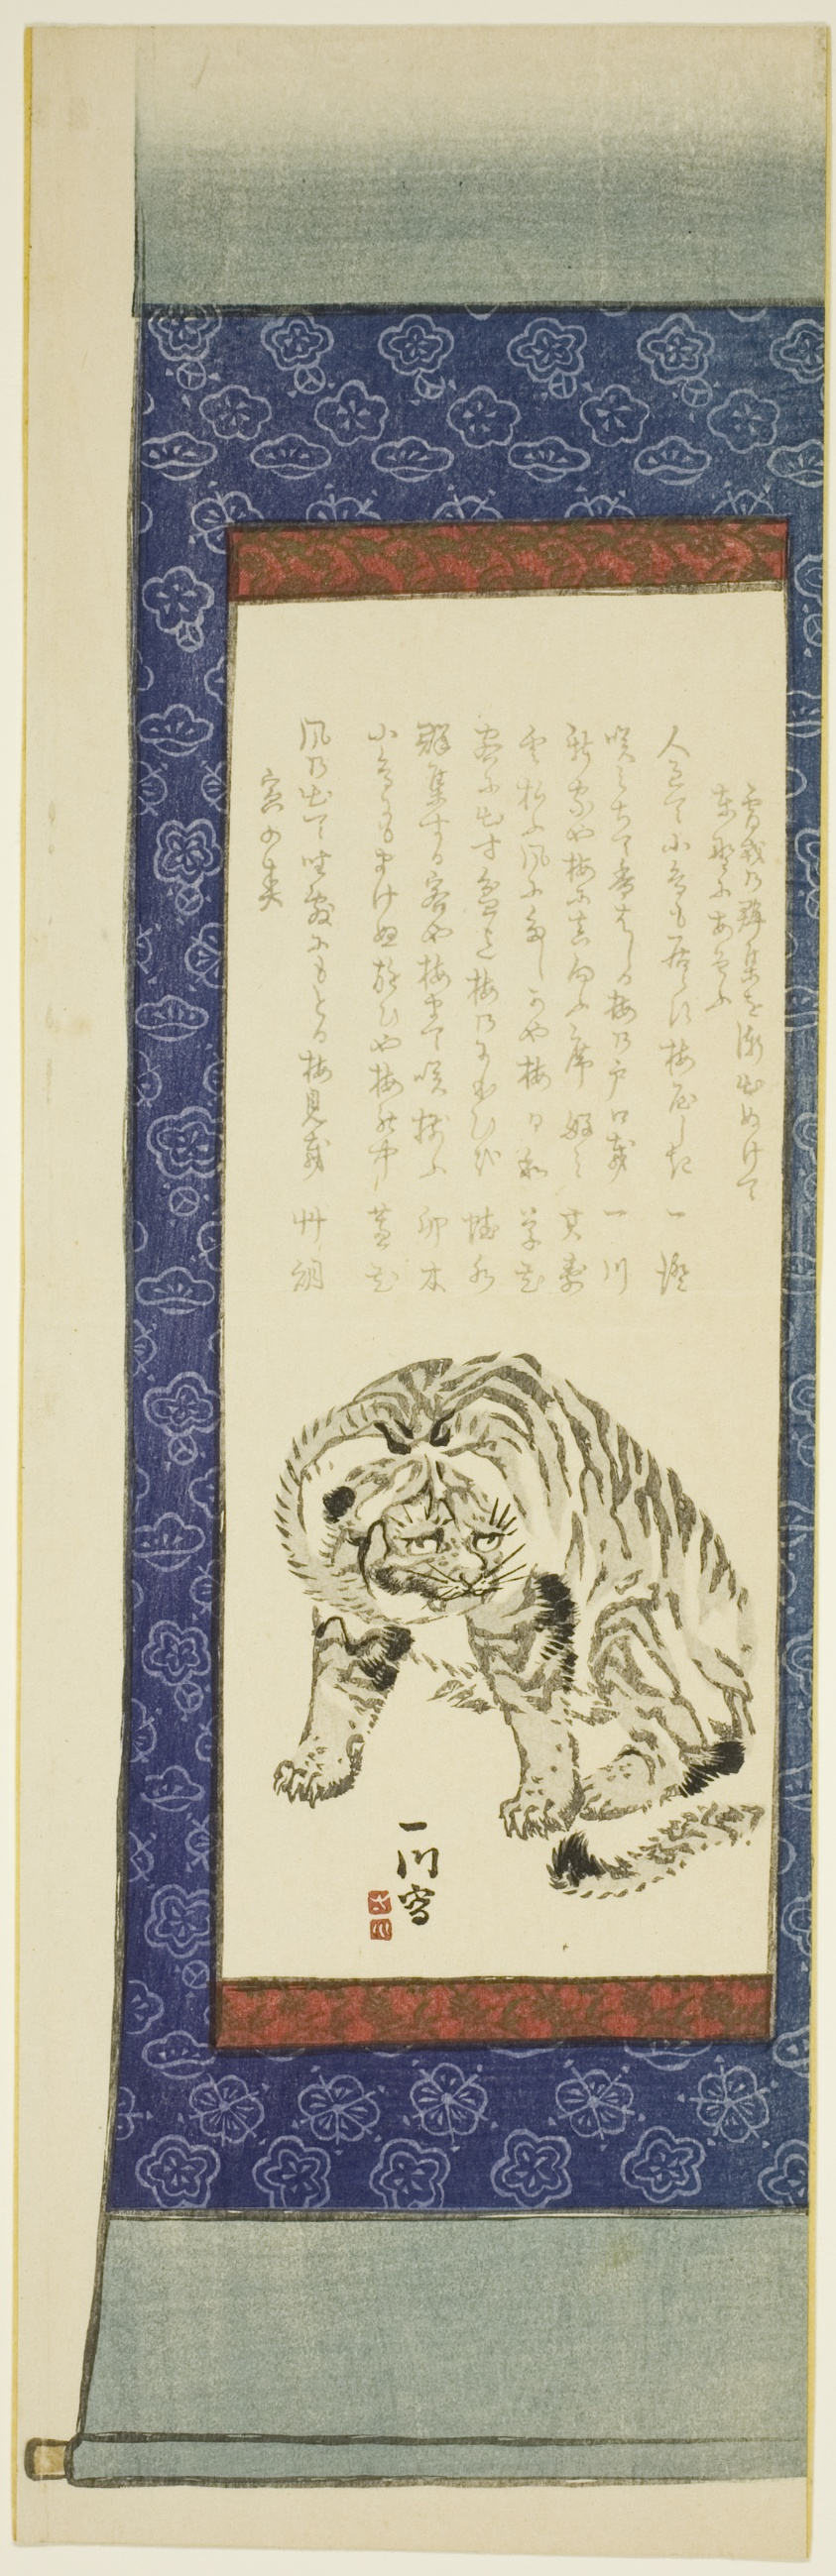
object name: Print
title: Tiger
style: Japanese (culture or style)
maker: Jujoen (Japanese, 1827-1906)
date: 1866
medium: Color woodblock print; surimono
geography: Japan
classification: woodblock print; print; asian art